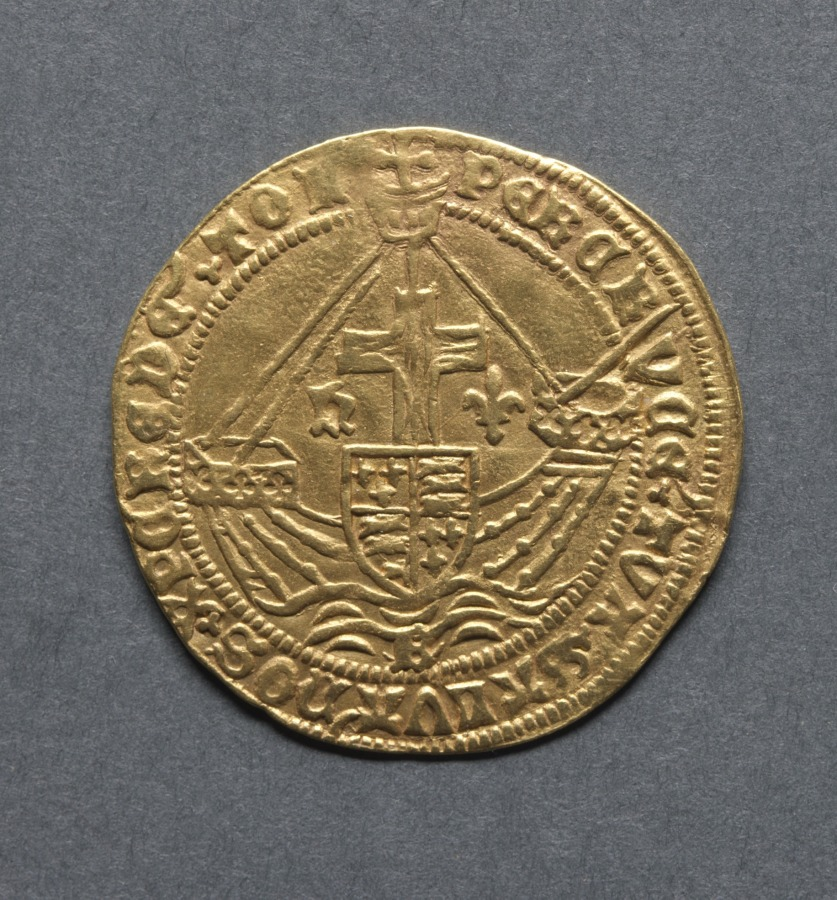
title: Angel: St. George Slaying the Dragon (obverse); Ship with Shield of Arms and Cross (reverse)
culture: England, Henry VI 1422-1461 (restored 1470-1471)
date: 1470–71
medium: gold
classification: Coins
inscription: HENRIC VI DI GRA REX ANGL FRANC DNS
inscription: PER CR VCE TVA. SALVA NOS XPC REDETOR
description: Henry VI regained power briefly in the usurpation period. The only gold coins struck during this short period were the angel and half angel, and only London and Bristol operated as mints.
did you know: The angel was an English gold coin introduced by Edward IV in 1465 and named for the depiction of St. George on the obverse.